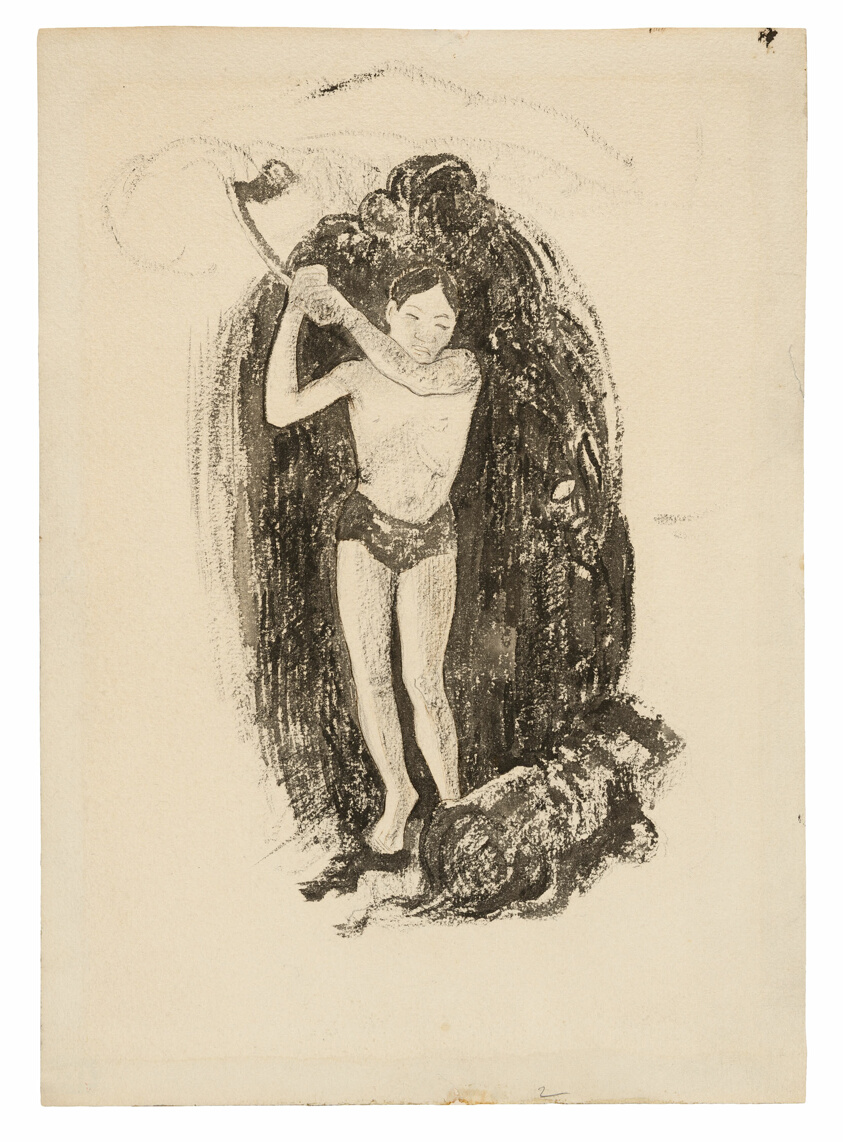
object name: Drawing and Watercolor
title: Man with an Ax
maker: Paul Gauguin (French, 1848–1903)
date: 1893/94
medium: Pen and black ink, and brush and black wash, with pen and brown ink (originally purple) and touches of graphite, on heavily textured ivory wove paper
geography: France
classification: prints and drawing; drawings (visual works); brush and ink; pen and ink drawings